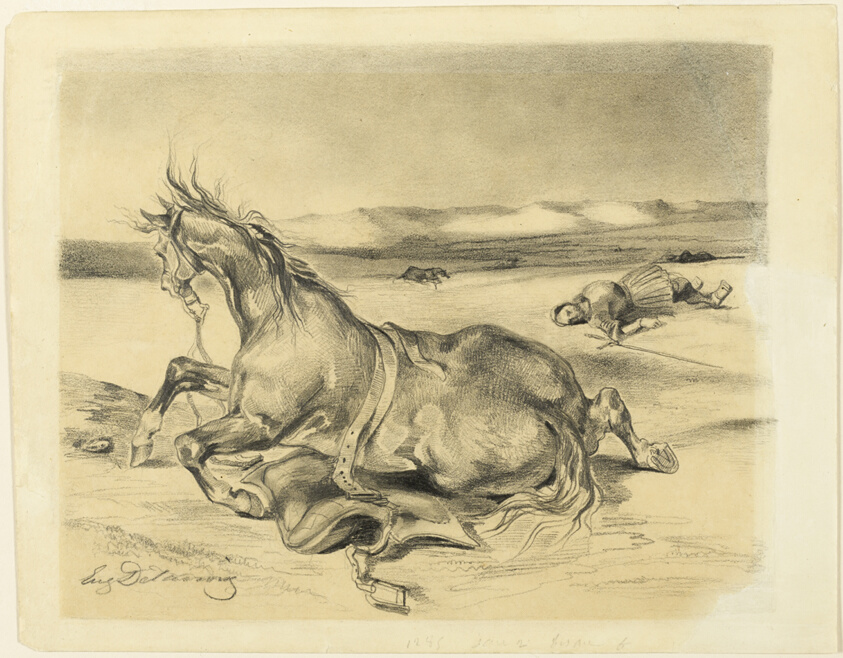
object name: Drawing and Watercolor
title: Fallen Horse and Dead Knight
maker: Eugène Delacroix (French, 1798-1863)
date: c. 1827–1829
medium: Graphite, with touches of stumping, on cream wove paper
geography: France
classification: graphite; drawings (visual works); prints and drawing